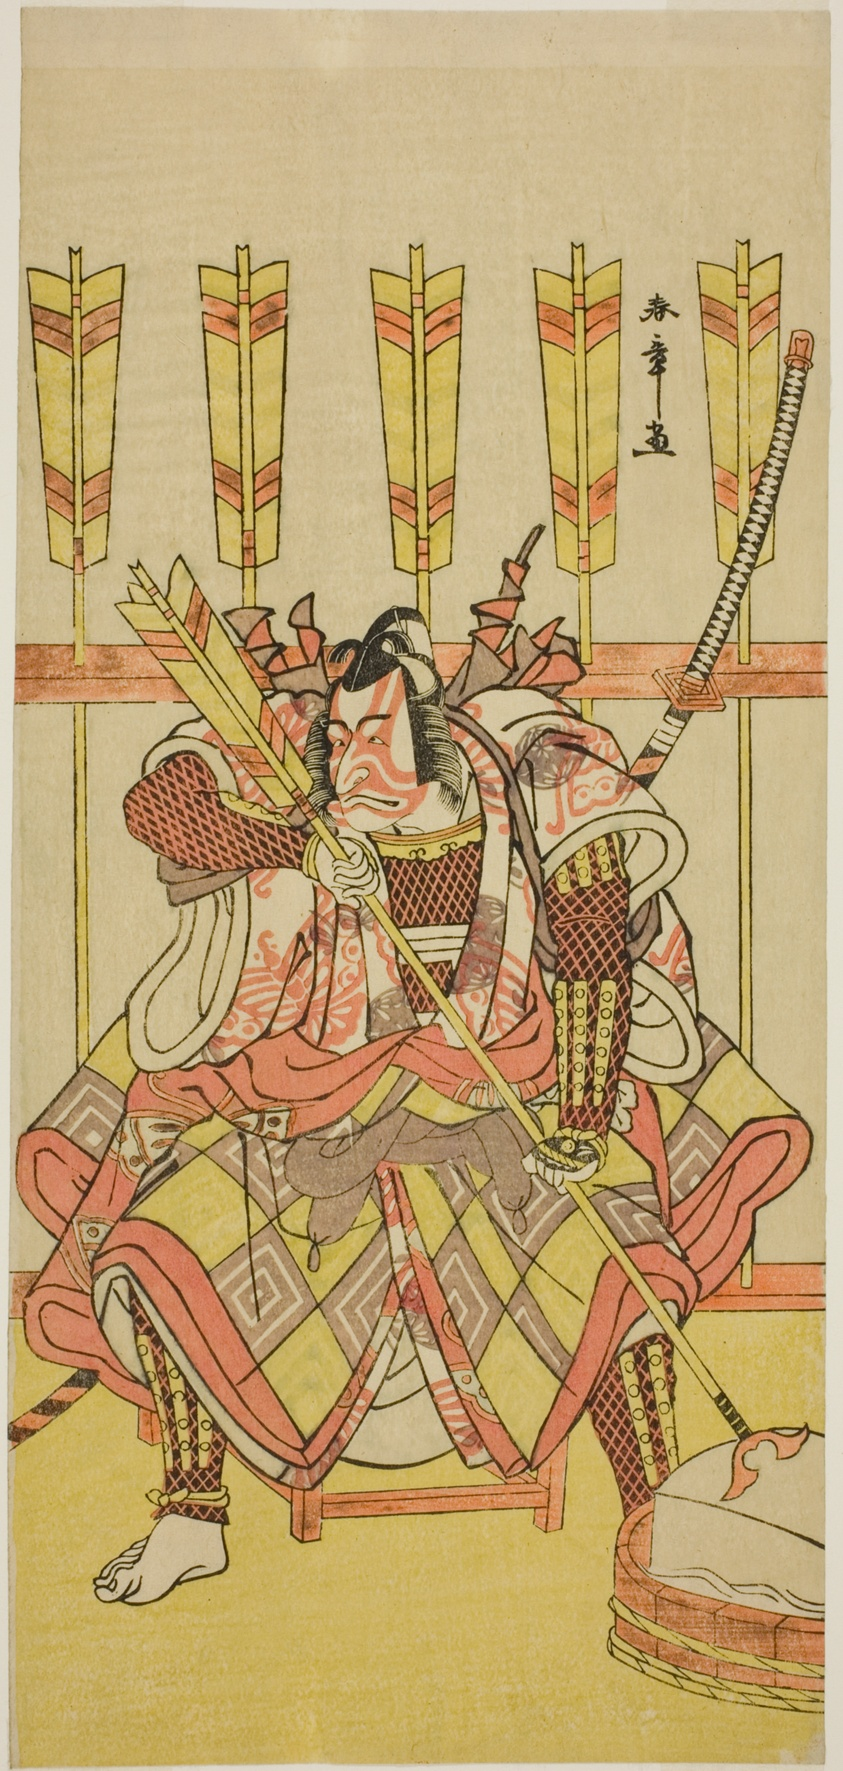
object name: Print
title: The Actor Ichikawa Danjuro V as Yanone Goro in the Play Kuruwa-gayoi Komachi Soga, Performed at the Nakamura Theater in the Fifth Month, 1781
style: Japanese (culture or style)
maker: Katsukawa Shunsho 勝川 春章; Japanese, 1726-1792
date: c. 1781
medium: Color woodblock print; hosoban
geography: Japan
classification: woodblock print; print; asian art